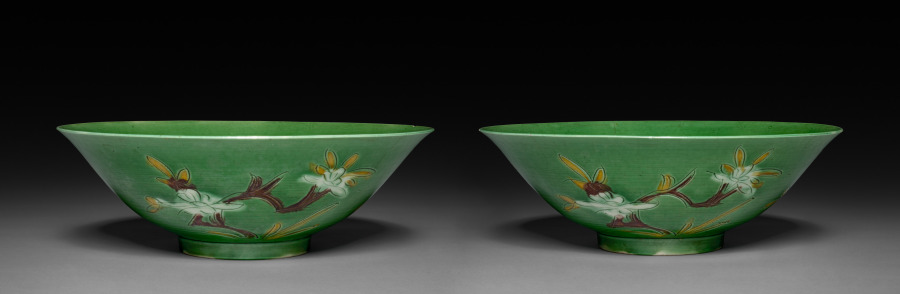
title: Pair of Bowls with Sprays of Flowers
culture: China, Jiangxi province, Jingdezhen kilns, Qing dynasty (1644-1911), Kangxi reign (1662-1722)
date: 1662–1722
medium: porcelain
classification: Ceramic